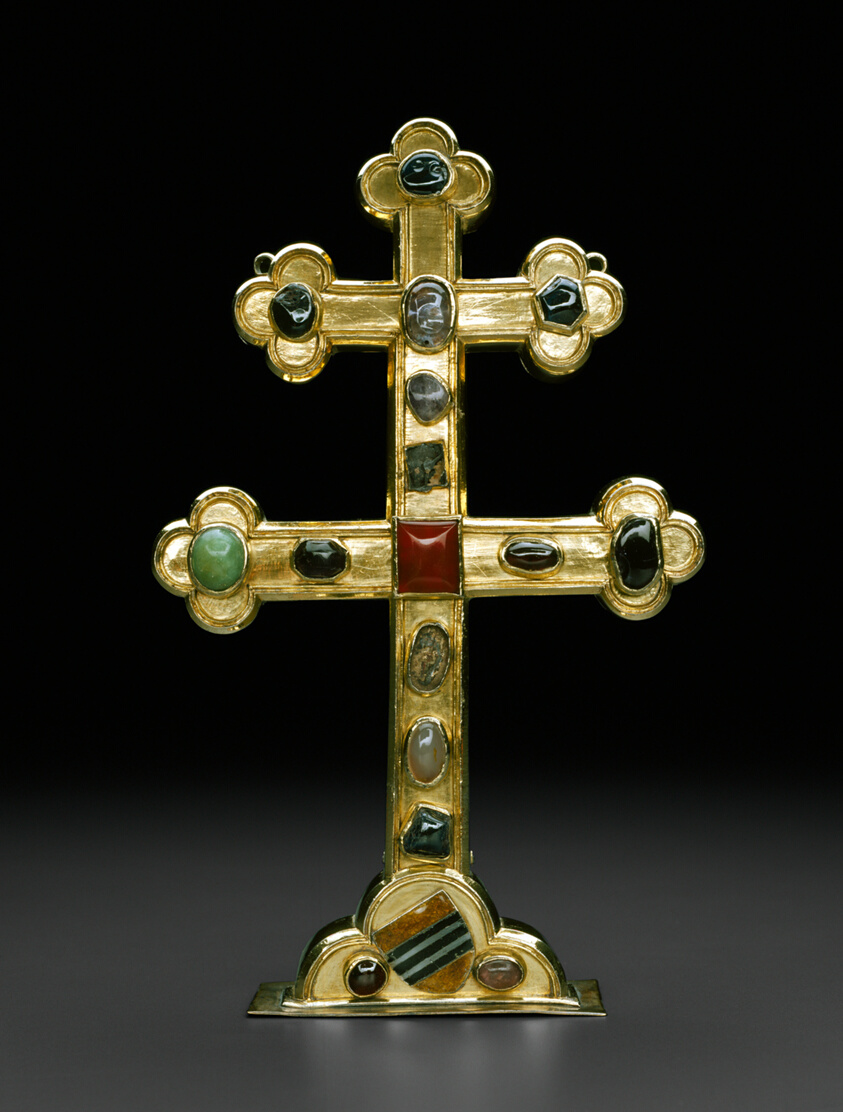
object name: Decorative Arts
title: Reliquary Cross with the Arms of the Veltheim Family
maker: German; Brunswick (Braunschweig)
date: c. 1300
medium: Silver gilt, enamel, and gemstones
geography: Brunswick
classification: silver; metalwork; european decorative arts; decorative arts